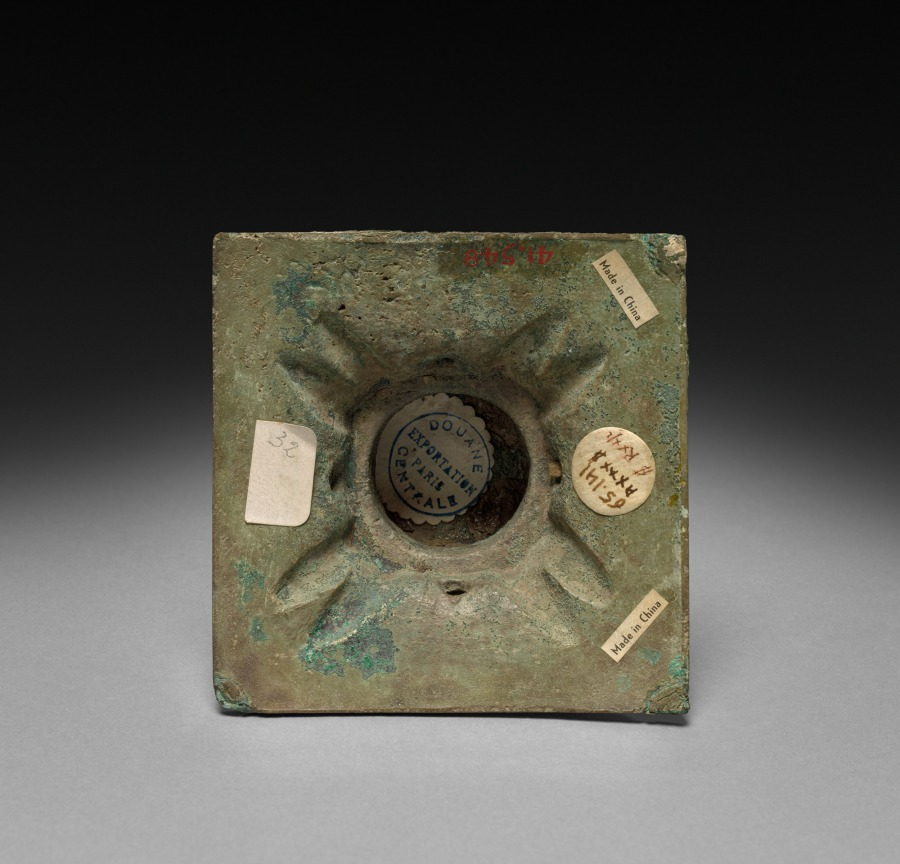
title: Handle of a Jiangu Drum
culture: China, Zhou dynasty (c. 1046–256 BCE), Spring and Autumn period (770–475 BCE)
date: c. 770–475 BCE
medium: bronze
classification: Metalwork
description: The most remarkable feature of this object is the four kneeling figures with ornamented bodies; Han dynasty sources mention cut hair and tattooing as a custom among the local Yue people. This bronze work served as a handle and top ornament of a large, barreled drum called jiangu (建鼓), supposedly made of lacquer and alligator skin. Two comparable handles from tombs dated to the Spring and Autumn period in Jiangsu and Anhui provinces were found amid musical instruments. The handle allows the drum to be suspended and played from the sides.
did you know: The square stud on the head of each figure may represent a bun.